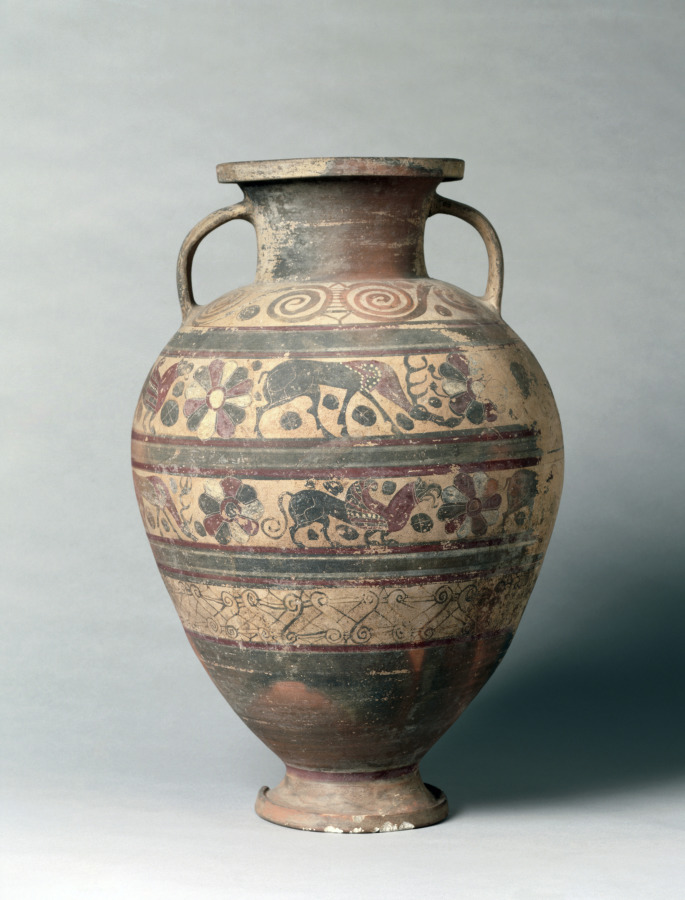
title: Black-Figure Neck-Amphora (Storage Vessel): Animal Friezes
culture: Etruscan (Etrusco-Corinthian)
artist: attributed to St. Louis Painter (Etruscan, active at Vulci, c. 600–580 BCE)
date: c. 600–580 BCE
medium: ceramic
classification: Ceramic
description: Although seemingly simple in design, this amphora populated with animals (some mythological) and vegetal ornaments speaks to complex cultural intermingling in the ancient world. Known as “Etrusco-Corinthian,” the vase was made in Vulci, an Etruscan site with local workshops influenced by the Greek pottery imported there. These imports, especially from the ancient city of Corinth, helped to bring certain motifs and creatures borrowed from the Near East—such as the griffins here—to the Italian peninsula. Among several lively Etruscan elements on this vase are flowering rosettes, including one about to be eaten by a stag foraging in the upper band.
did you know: The same potter and painter (whether one person or two) also made vases now in Saint Louis and Paris.